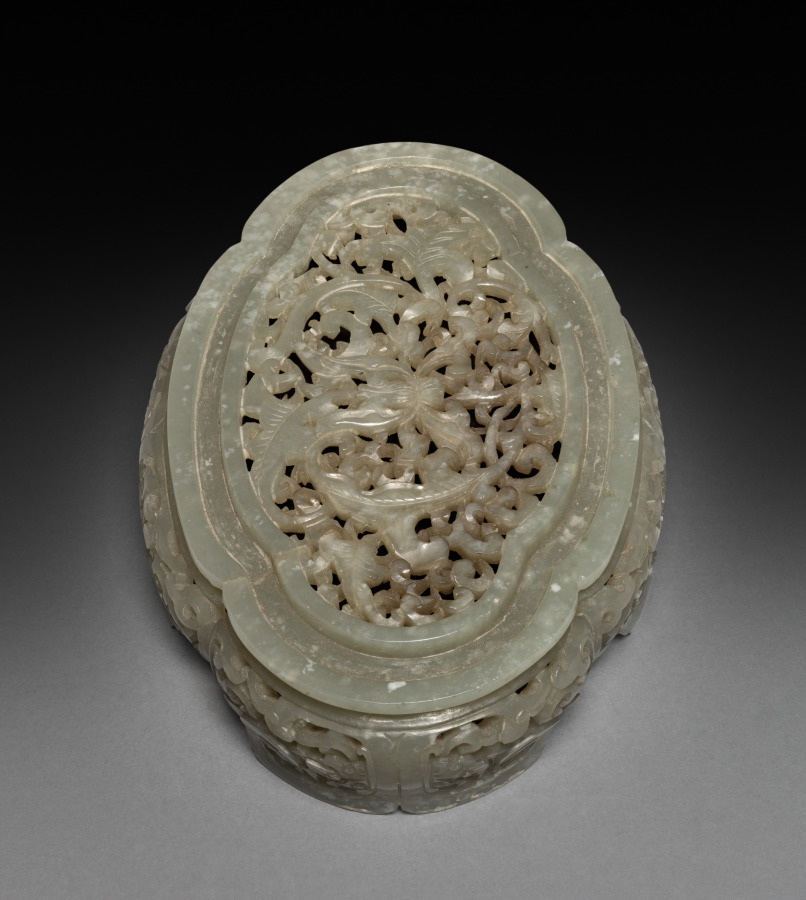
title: Octofoil Dish with Three Boys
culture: China, Qing dynasty (1644–1911), Qianlong reign (1736–95)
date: 1700s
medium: jade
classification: Jade